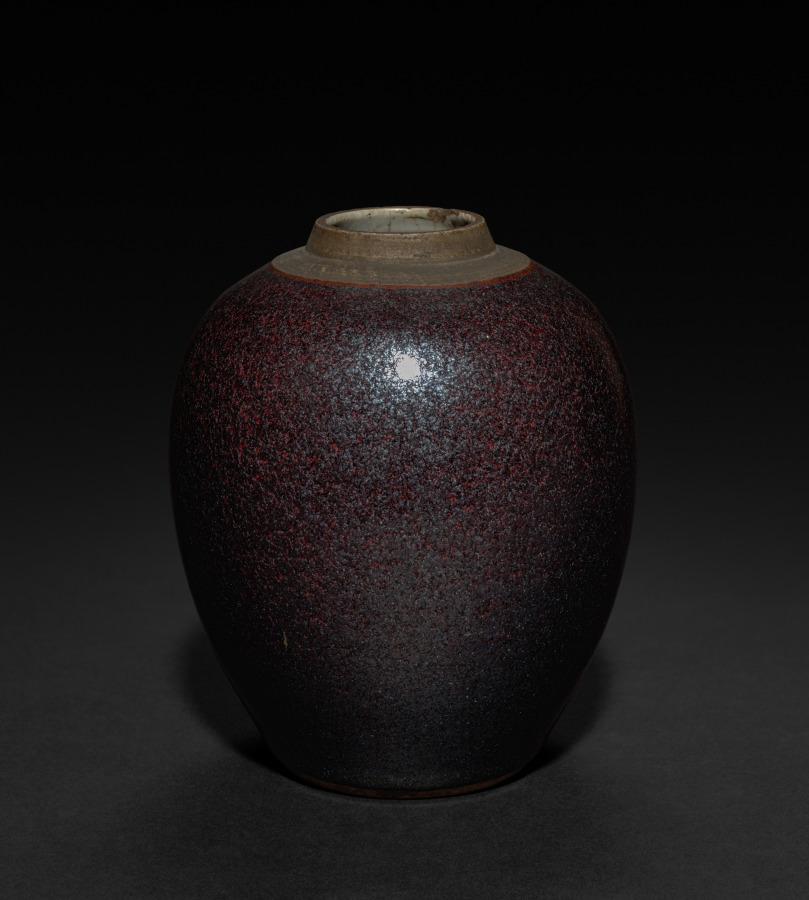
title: Jar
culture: China, Qing dynasty (1644–1911), Qianlong reign (1736–95)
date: 1736–95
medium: porcelain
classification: Ceramic